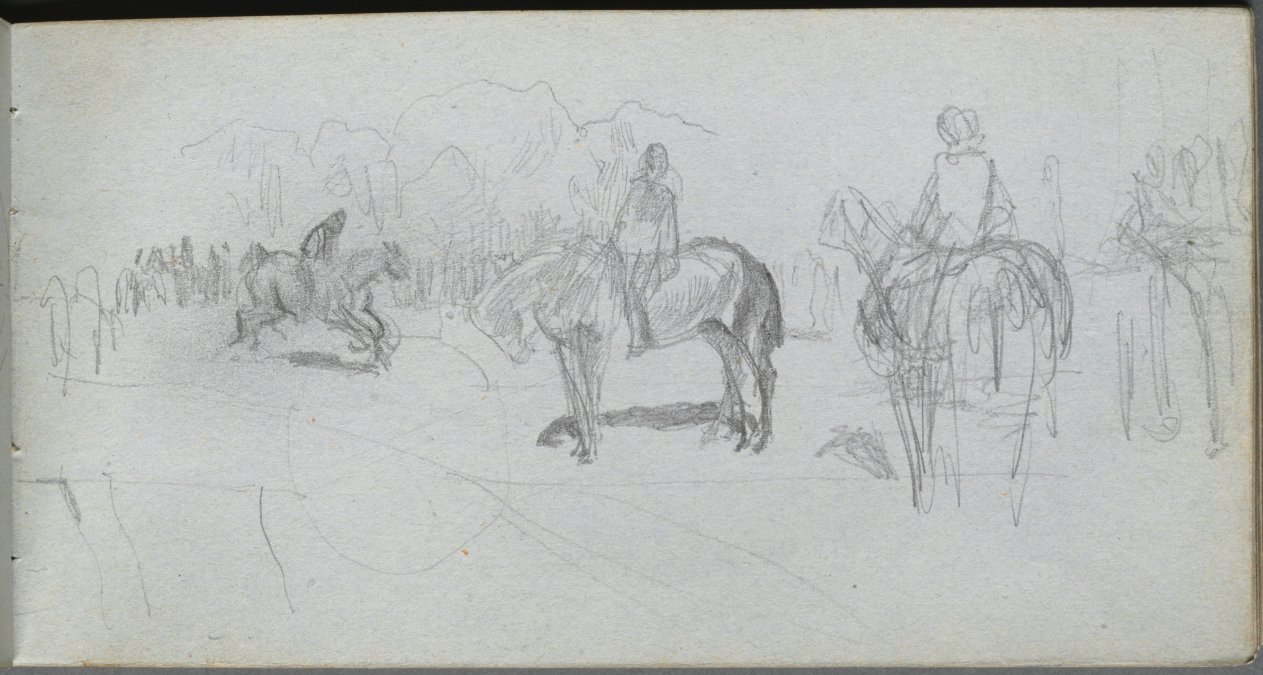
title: Sketchbook, page 52: Figure Study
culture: France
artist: Ernest Meissonier (French, 1815–1891)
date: c. 1860s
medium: graphite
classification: Bound Volume